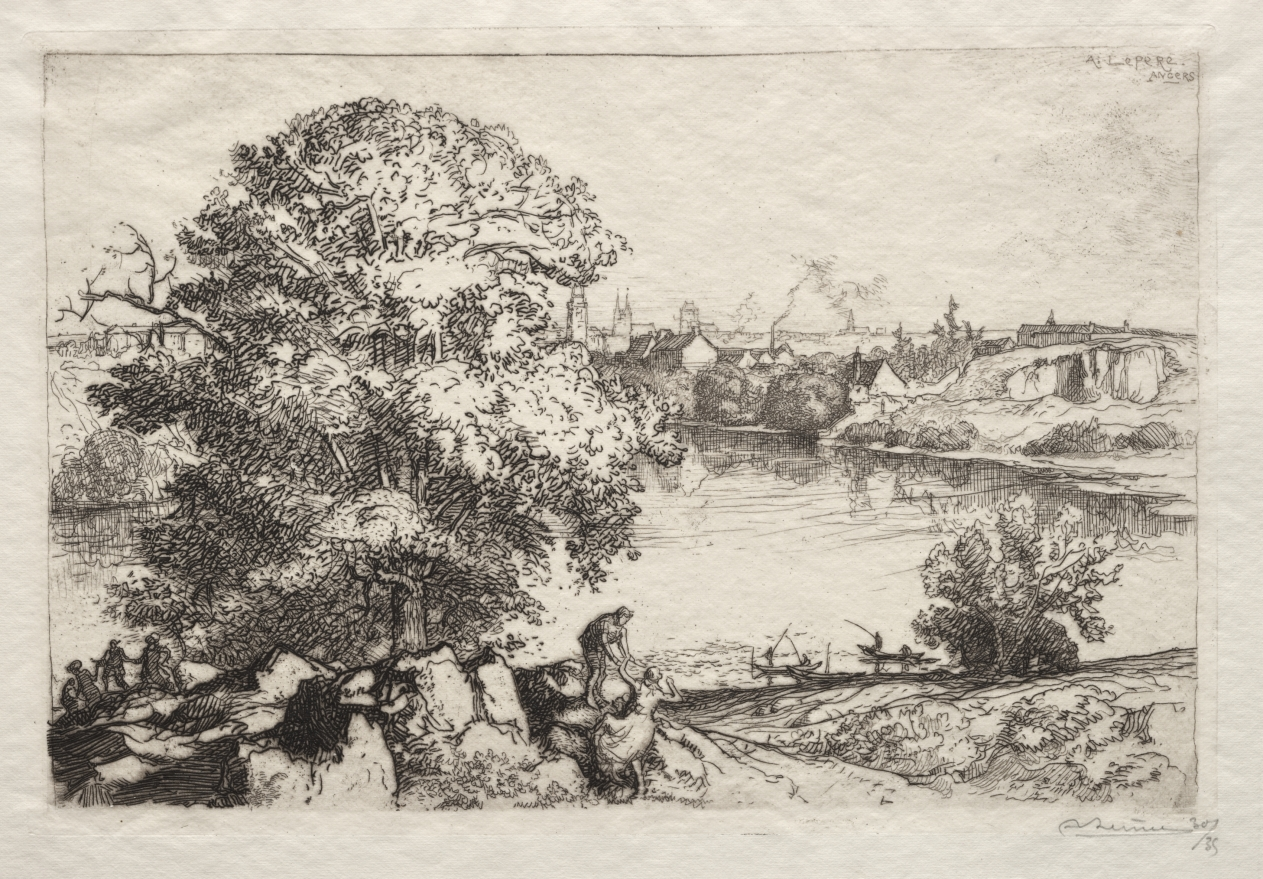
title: Angers: L'Étang St. Nicolas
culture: France, 20th century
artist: Auguste Louis Lepère (French, 1849–1918)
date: 1912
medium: etching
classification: Print